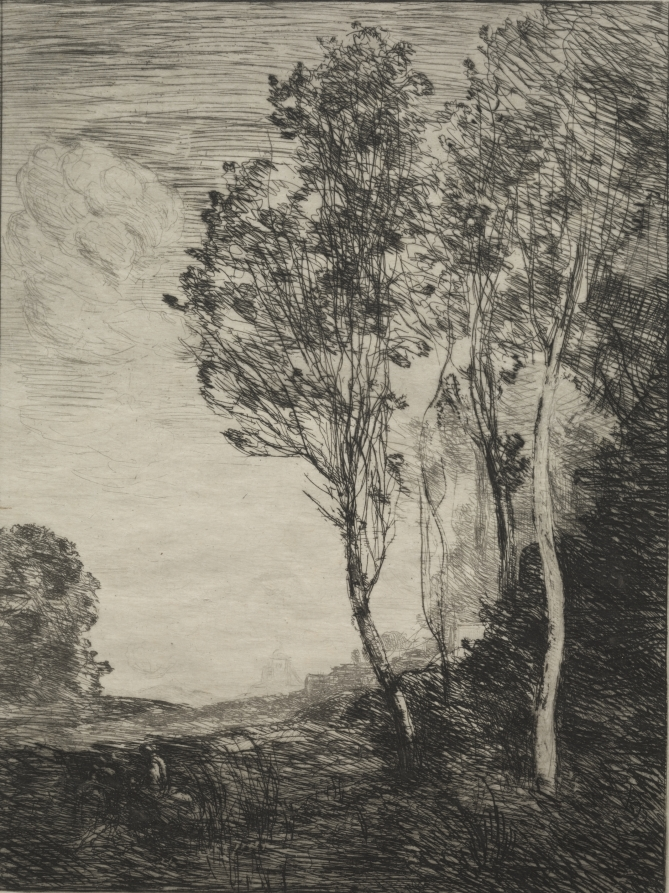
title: Souvenir of Italy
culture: France, 19th century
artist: Jean Baptiste Camille Corot (French, 1796–1875)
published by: Cadart and Chevalier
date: 1866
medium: etching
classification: Print